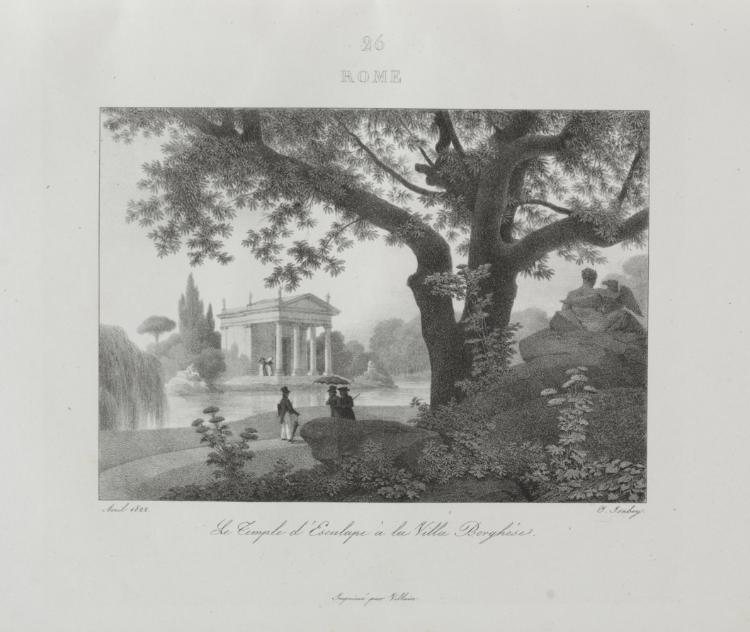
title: Voyage en Italie en 1822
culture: France, 19th century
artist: Jean-Baptiste Isabey (French, 1767–1855)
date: 1833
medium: lithograph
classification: Bound Volume